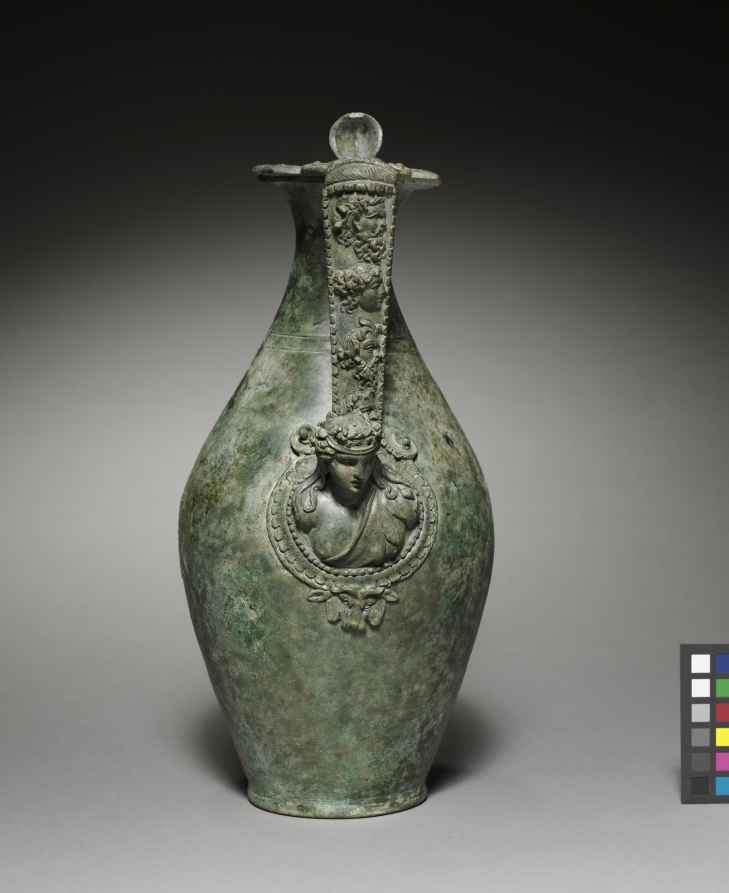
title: Olpe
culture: Italy, Roman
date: 1–100 CE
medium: cast bronze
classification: Metalwork